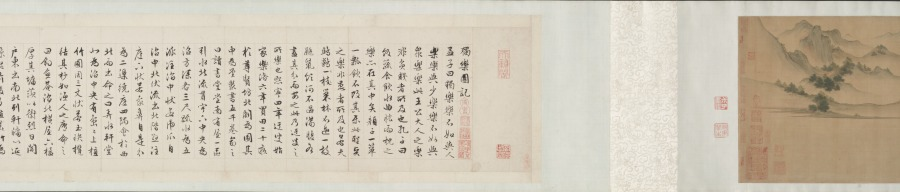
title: Garden for Solitary Enjoyment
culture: China, Ming dynasty (1368–1644)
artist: Qiu Ying (Chinese, 1494–1552)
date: 1515–52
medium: Handscroll; ink and light color on silk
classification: Painting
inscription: Accompanying text of an essay together with seven poems of Sima Guang (1019–1086) and one poem of Su Shi (1037–1101) written by Wen Zhengming (1470–1559) in 1558.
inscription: 2 colophons and 82 seals: 4 seals of Wen Zhengming 文徵明 (1470–1559); 59 seals of Xiang Yuanbian 項元汴 (1525–1590); 1 colophon, dated 1644, and 7 seals of Xiang Yukui 項禹揆 (c. late 1500s–1659); 1 colophon, dated 1880, and 2 seals of Weng Tonghe 翁同龢 (1830–1904); 2 seals of Ch'eng Chen-i (19th c.); 1 seal of Han Ch'ung (19th c.); 4 seals of Wan-go H. C. Weng 翁萬戈 (1918–2020); 3 seals unidentified.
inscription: Colophon by Xiang Yukui 項禹揆 (c. late 1500s–1659): The painting of The Garden for Self-enjoyment on the right by Shih-chou, Mr. Qiu [Qiu Ying] is in the style of Li Lung-mien. Its mood is peaceful, as if meeting the ancient gentlemen face to face among the brushes and silk; it lifts one above the sordid bustle of life. Formerly, my late father handed me this scroll which had only the painting without the written essay. I considered asking a good calligrapher to write the essay to add to it but was afraid that the quality of the writing would not match the painting. Several years later, I saw at a friend's house this essay and poems (of Ssu-ma Kuang] written by Hengshan [Wen Zhengming], once owned by my grandfather; so I spared no expense to obtain it. I rejoiced at this and said: "The divine swords are finally united. How things are pre-destined!" Now my friend Chang Kung-chao's technique for mounting [painting and calligraphy] is excellent. Therefore by daring to take them out and join them together, I can preserve this beautiful story of singular reunion. Xiang Yukui recorded at Hai-yeh-t'ang [hall] two days before New Year's Eve in the jiasheng year of the Chongzhen era [1644]. trans. LYSL/HK/WKH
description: Garden of Solitary Enjoyment refers to a site built in 1073 by the statesman Sima Guang (1019–1086) after he had retired to Luoyang, Henan province. Every spring, visitors would flock to his garden. Each of its seven structures references a historic figure. Sima wrote: I channel streams [like Du Mu], to water flowers [like Bai Juyi], or trim bamboo [like Wang Huizhi]. . . . I know of no joy between heaven and earth that could take its place. Qiu Ying’s painting, created after an 11th-century version of the same theme, must have appealed to garden owners of the Ming dynasty, since it became the template for numerous Suzhou workshop copies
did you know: Sima Guang completed his monumental survey of Chinese history, Zizhi tongjian, in the garden depicted in this painting.